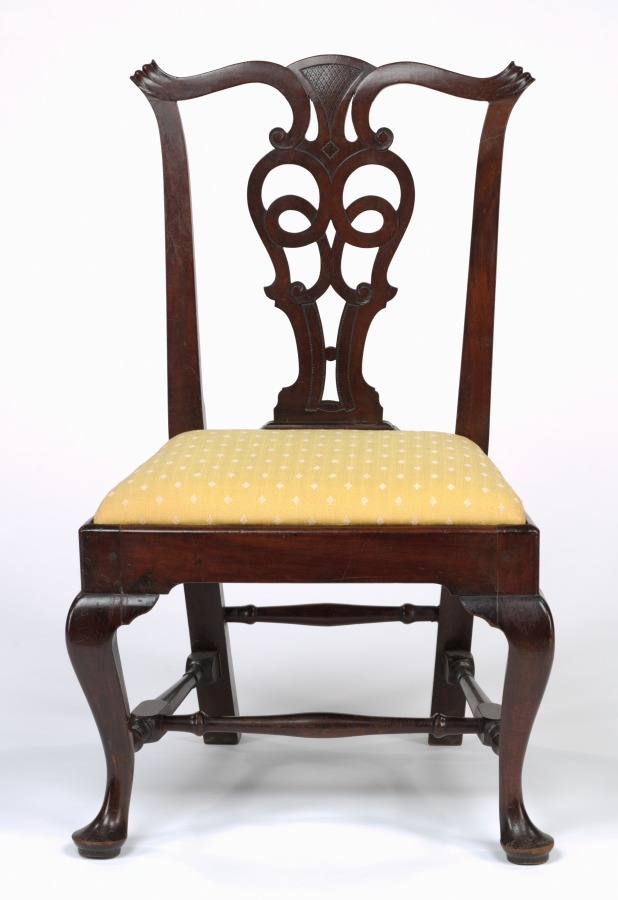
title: Side Chair (2 of 2)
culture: America, Rhode Island, Newport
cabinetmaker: John Townsend (American, 1732–1809)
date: c. 1775–90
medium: mahogany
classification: Furniture and woodwork